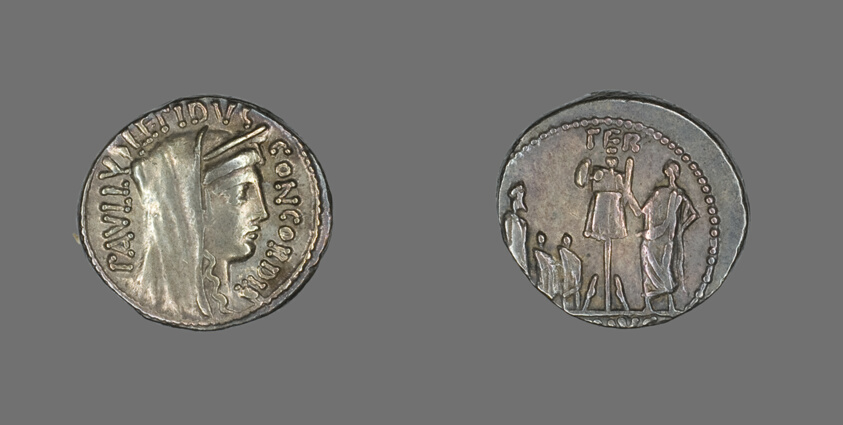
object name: Coin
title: Denarius (Coin) Depicting the Goddess Concordia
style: roman (ancient, style or period), ancient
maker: Roman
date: about 62 BCE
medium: Silver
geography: Roman Empire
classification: coin; ancient art